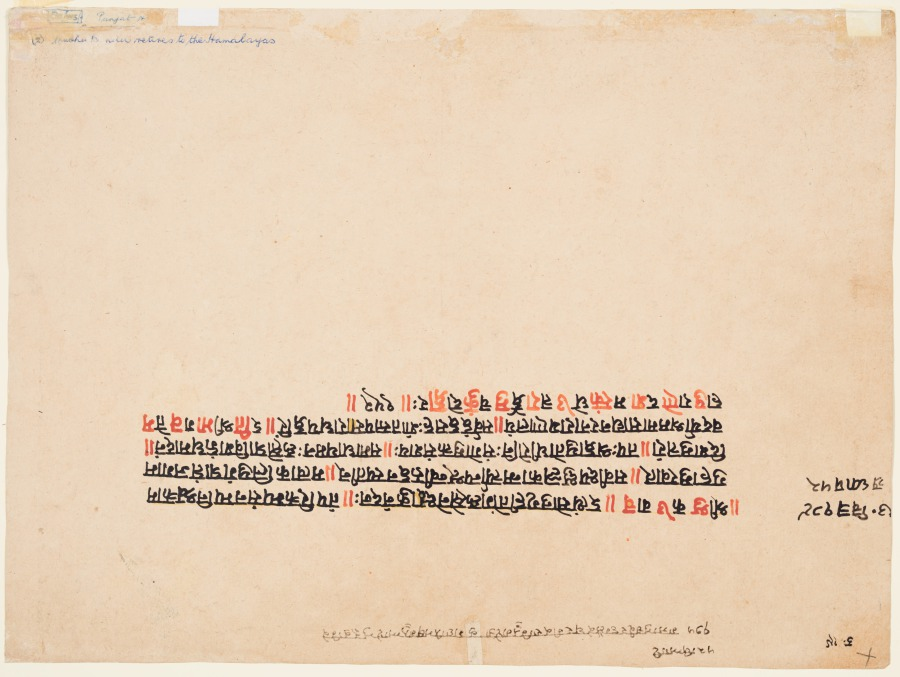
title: King Muchukunda Enters the Realm of Mount Gandhamadana to Attain Salvation, from the “Fifth Basohli Bhagavata Purana”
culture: Northern India, Pahari kingdoms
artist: attributed to Fattu (Indian)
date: c. 1760–70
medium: Gum tempera, ink, and gold on paper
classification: Painting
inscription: 52 dhiāi. 175 rājā mucakaṃda vara laike badari kadāri nū gae tā ku[la] yavāni matharā nū āye yudha karike.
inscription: chitra 139, adhyāya 52. śrī śruka uvācha. itthaṃ sonugṛhītoṃga kṛṣṇenekshvākunandanaḥ. taṃ parikramya saṃnamya niṣcakāma guhāmukhāt. sa vīkśya kśullakānmatryānpaśrunvīrudvanaspatīn. matvā kaliyugaṃ prāptaṃ jagām diśamuttarāṃ. tapaḥ śraddhāyuto dhīro niḥsaṃgo muktasaṃśayaḥ. samādhāya manaḥ kṛṣṇe prāviśādgaṃdhamādanam. vadaryā śramamāsādya naranārāyaṇālayaṃ. sarvadvaṃdvasahaḥ śāṃtasyapasārādhayaddhariṃ. iti śrī bhāgavate mahāpurāṇe daśama skaṃdhe uttarārdhe mucakuṃdoddharaḥ. 152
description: According to Hindu mythology, Muchukunda, the man dressed in saffron, fell asleep in a cave and slept for thousands of years. When he finally woke up, Krishna appeared and advised him to perform penance to cleanse the accumulated sins and attain liberation. He went to Mount Gandhamadana, on India’s east coast, to practice atonement.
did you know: The painting was turned horizontally, suggested by the upside down inscription on the verso